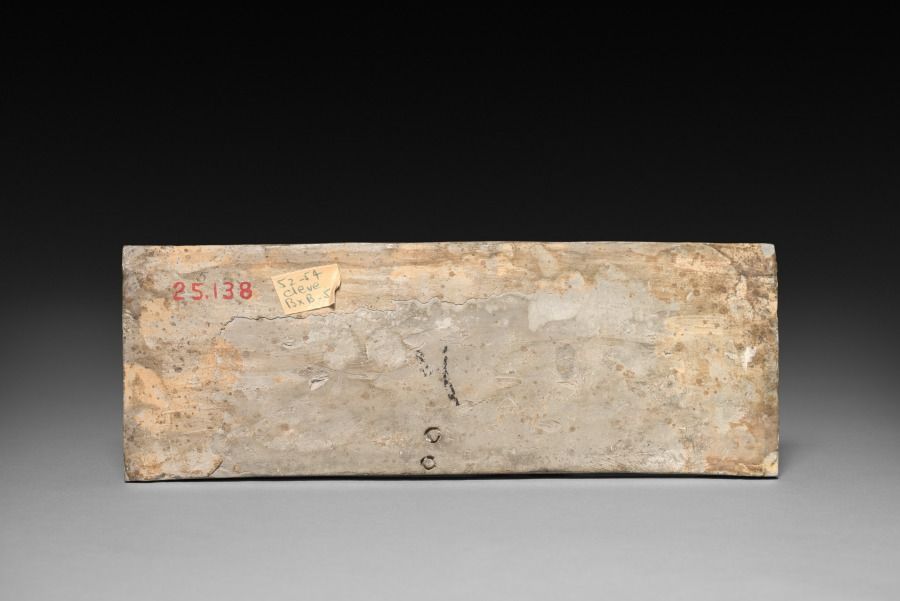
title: Relief with Dragon from a Funerary Stove Model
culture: China, from a tomb in Xi'an, Shaanxi province, Han dynasty (202 BCE–220 CE)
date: 202 BCE–220 CE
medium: earthenware with relief decoration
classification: Ceramic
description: Han dynasty tombs were often furnished with grave goods to provide the deceased with items for the afterlife. This panel with a dragon was part of a miniature pottery stove to be placed in a burial chamber. The dragon is an auspicious creature and an animal of the cardinal directions that protects the east.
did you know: Han dynasty tombs were often furnished with grave goods to provide the deceased with items for the afterlife.